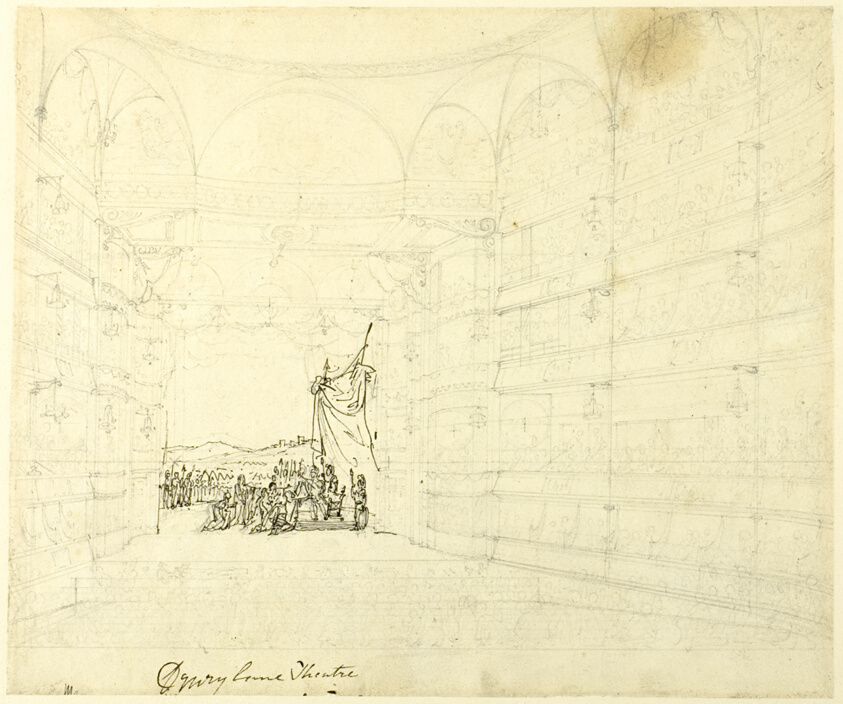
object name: Drawing and Watercolor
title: Study for Drurylane Theater, from Microcosm of London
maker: Augustus Charles Pugin (English, born France, 1762-1832); Thomas Rowlandson (English, 1756-1827)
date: c. 1808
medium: Graphite with pen and brown ink on cream wove paper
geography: England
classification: graphite; drawings (visual works); prints and drawing